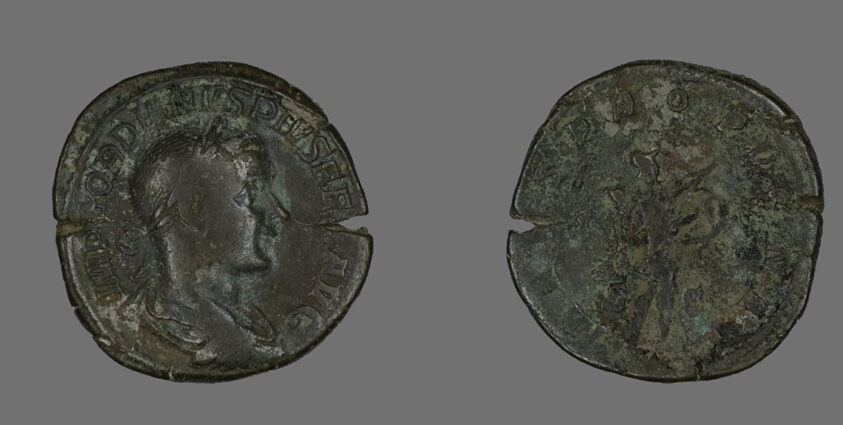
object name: Coin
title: Sestertius (Coin) Portraying Emperor Gordianus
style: roman (ancient, style or period), ancient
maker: Roman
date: 238-244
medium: Bronze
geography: Roman Empire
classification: coin; ancient art